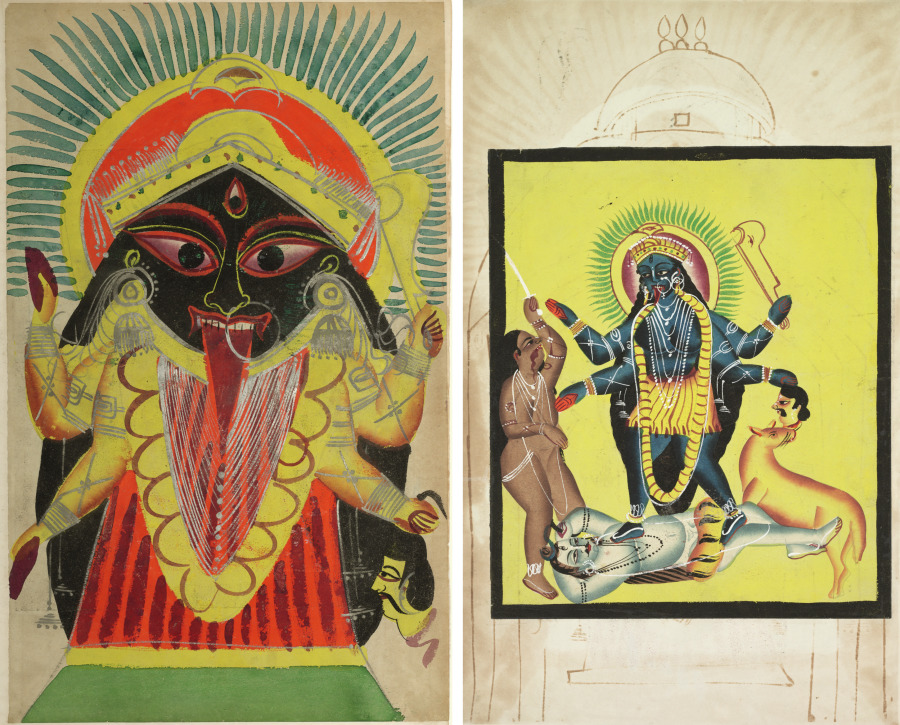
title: Leaf from a Kalighat album: The Goddess Kali (recto); Kali Standing on Shiva (verso)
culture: Eastern India, Bengal, Kolkata, Kalighat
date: c. 1890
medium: Gum tempera, graphite, ink, and tin on paper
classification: Painting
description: Black-skinned, four-armed, her tongue out, and blood dripping from her mouth, Kali has a third eye—representative of enlightened or divine knowledge—on her forehead. Simultaneously benevolent and dangerous, she holds a sword and a demon’s severed head in two hands while the other two hands are in gestures of protection and blessing. This image would have been sold as a pilgrim souvenir to both locals and the colonial British around the Kalighat temple and is a replica of the image worshipped inside the temple. The frightening image of Kali especially fit into the colonial imagination and into Victorian popular culture and would have been an iconic souvenir/artifact to be shown to intrigued and horrified friends at home in England.